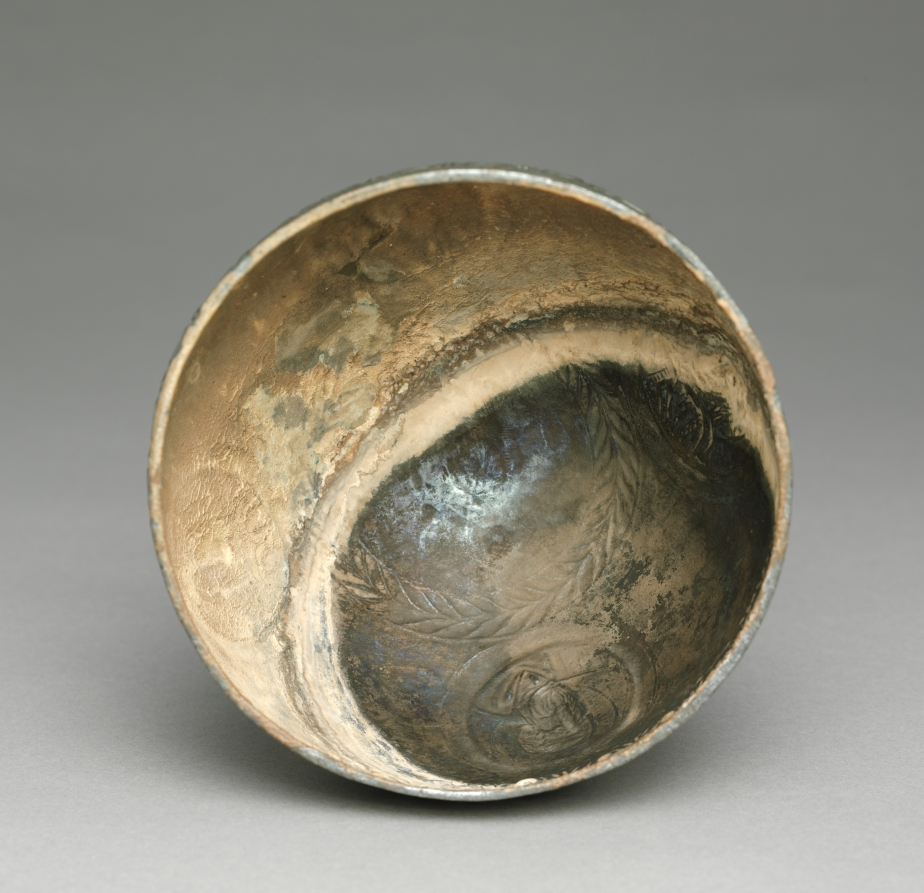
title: Chalice from the Beth Misona Treasure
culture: early Byzantium, Constantinople or Syria, Byzantine period, 6th-7th Century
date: c. 500–700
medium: silver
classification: Metalwork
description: These four liturgical silver vessels—a paten and three chalices (1950.378–81)—form what is now called the Beth Misona Treasure, named for the village in northern Syria for which the objects were made. While nothing is known about the exact location and circumstances of the treasure's discovery, the people of the village of Beth Misona were, like other Christian communities in Syria and Palestine, probably forced to bury their church silver to hide it from the Persians or Arabs, who conquered their lands in the first half of the 600s. The paten, which held pieces of Eucharistic bread used during Mass, is decorated with an engraved Latin cross surrounded by a dedicatory inscription that names the paten's donor—Domnos—and its original location, the church of Saint Sergios in Beth Misona. The chalices, which contained the Eucharistic wine used during Mass, feature broad cups decorated with portrait busts of Saints Peter and Paul, Christ, and the Virgin. One chalice bears a dedicatory inscription naming its donor—Kyriakos, Domnos's son—and the priest of the church that received the pious gift—Zeno.